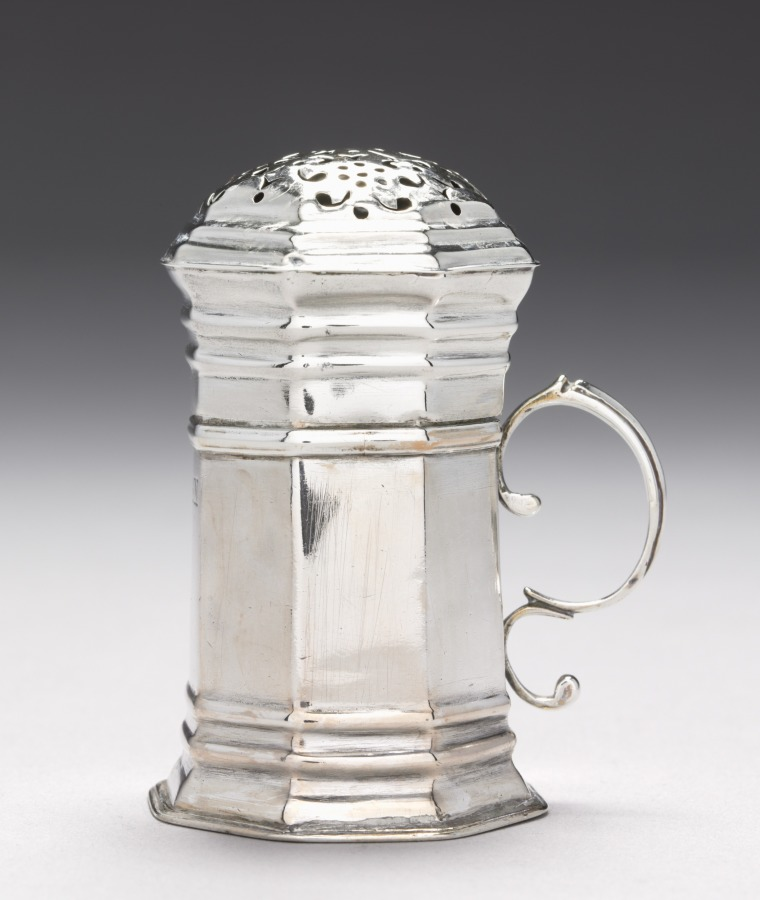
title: Caster with Lid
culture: America, Massachusetts, Boston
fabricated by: Andrew Tyler (American, 1692–1741)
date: c. 1720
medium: silver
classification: Silver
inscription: engraved: "M" over "D * L" in shaded block letters on bottom, and "AM" in block letters on front, opposite handle.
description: A caster was used to spread a finely ground substance, probably pepper.